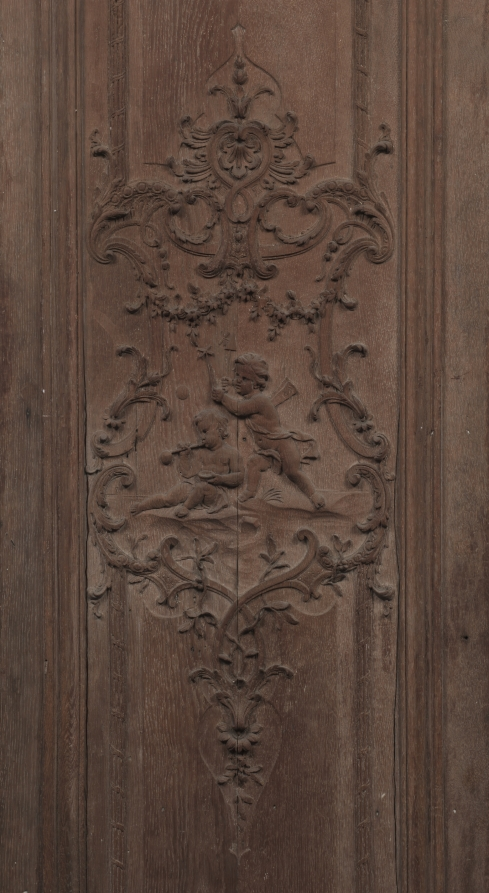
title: Panel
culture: France, Regency Period, 18th Century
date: 1715–1723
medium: wood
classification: Furniture and woodwork